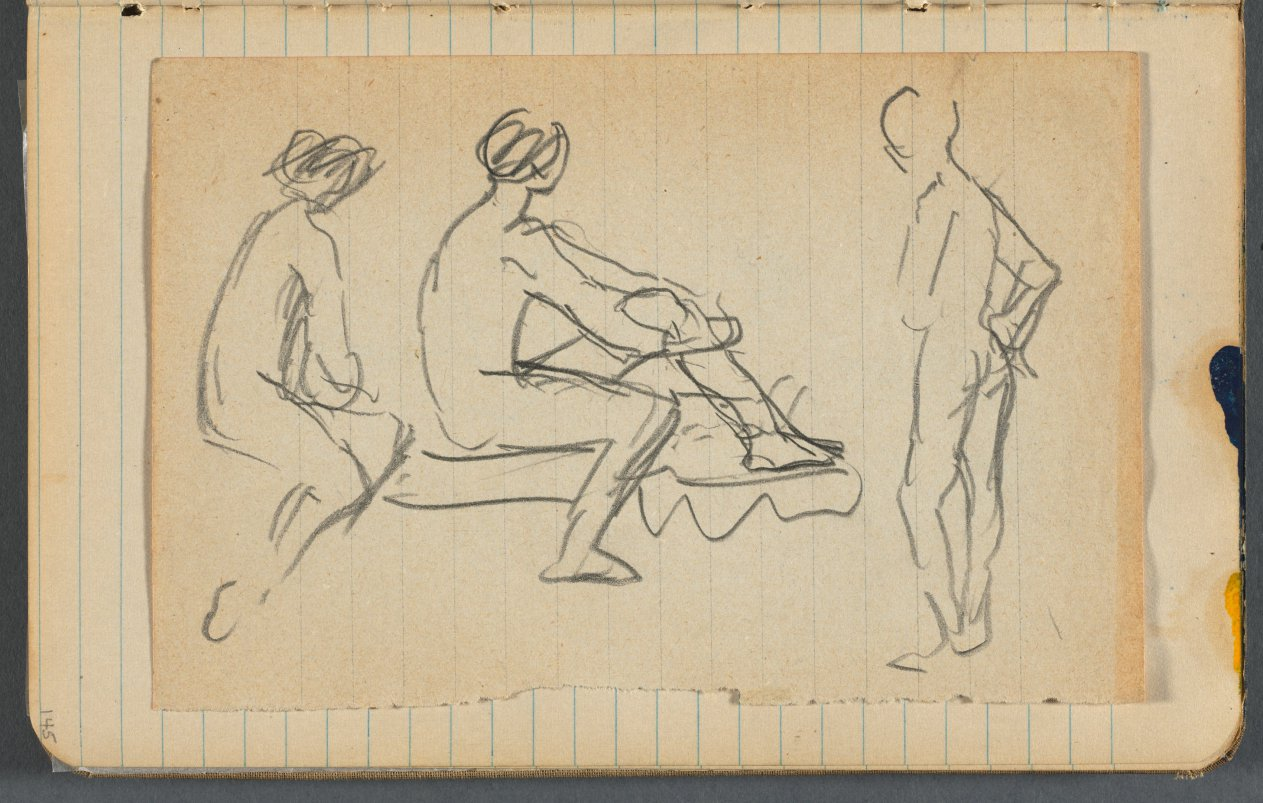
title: Sketchbook, loose sheet between pgs. 145 & 146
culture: America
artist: Maurice Prendergast (American, born Newfoundland [now Canada], 1858–1924)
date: 1905–10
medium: graphite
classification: Bound Volume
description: This sketchbook contains 69 pages of drawings, a diary largely devoted to the state of the artist's health, and a three-page discourse on the nature of genius and ideas.